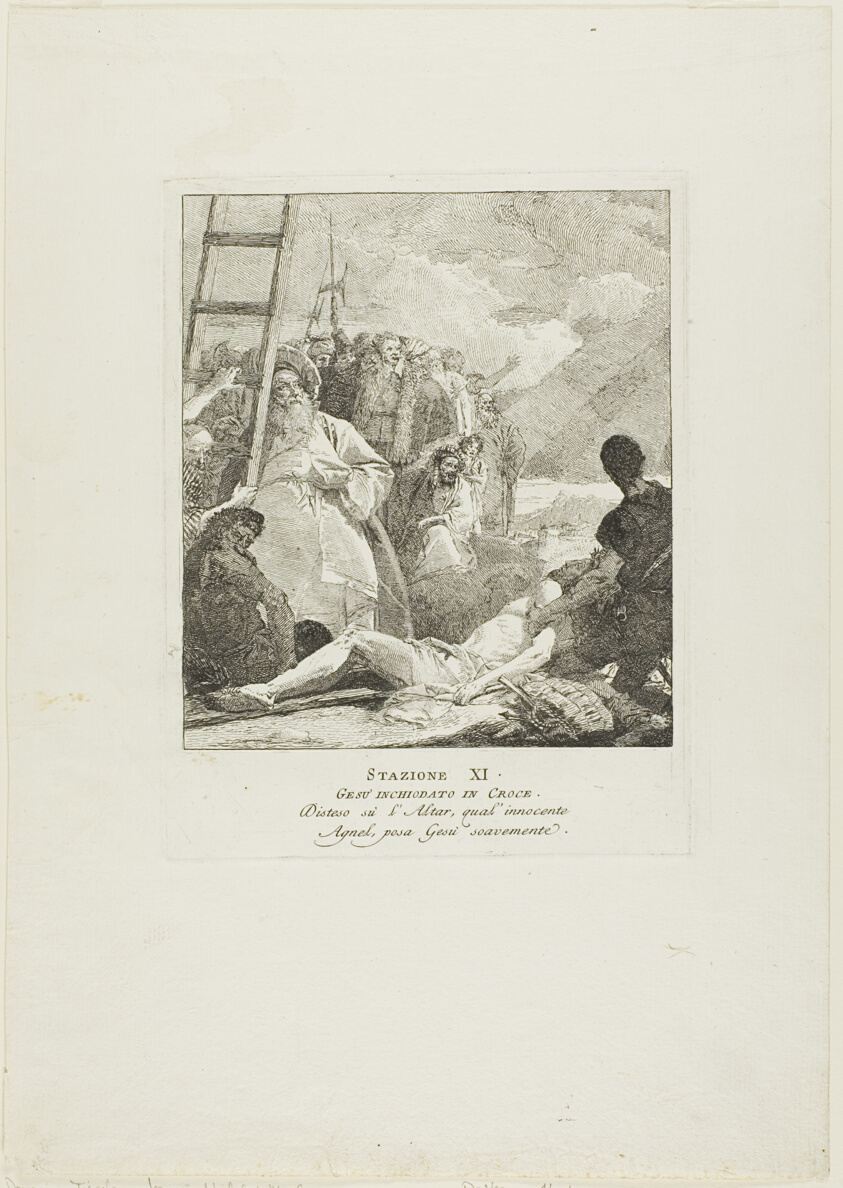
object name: Print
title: Christ is Nailed to the Cross, plate eleven from Stations of the Cross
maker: Giovanni Domenico Tiepolo (Italian, 1727-1804)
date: c. 1748, published 1749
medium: Etching on paper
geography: Italy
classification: etching; print; prints and drawing